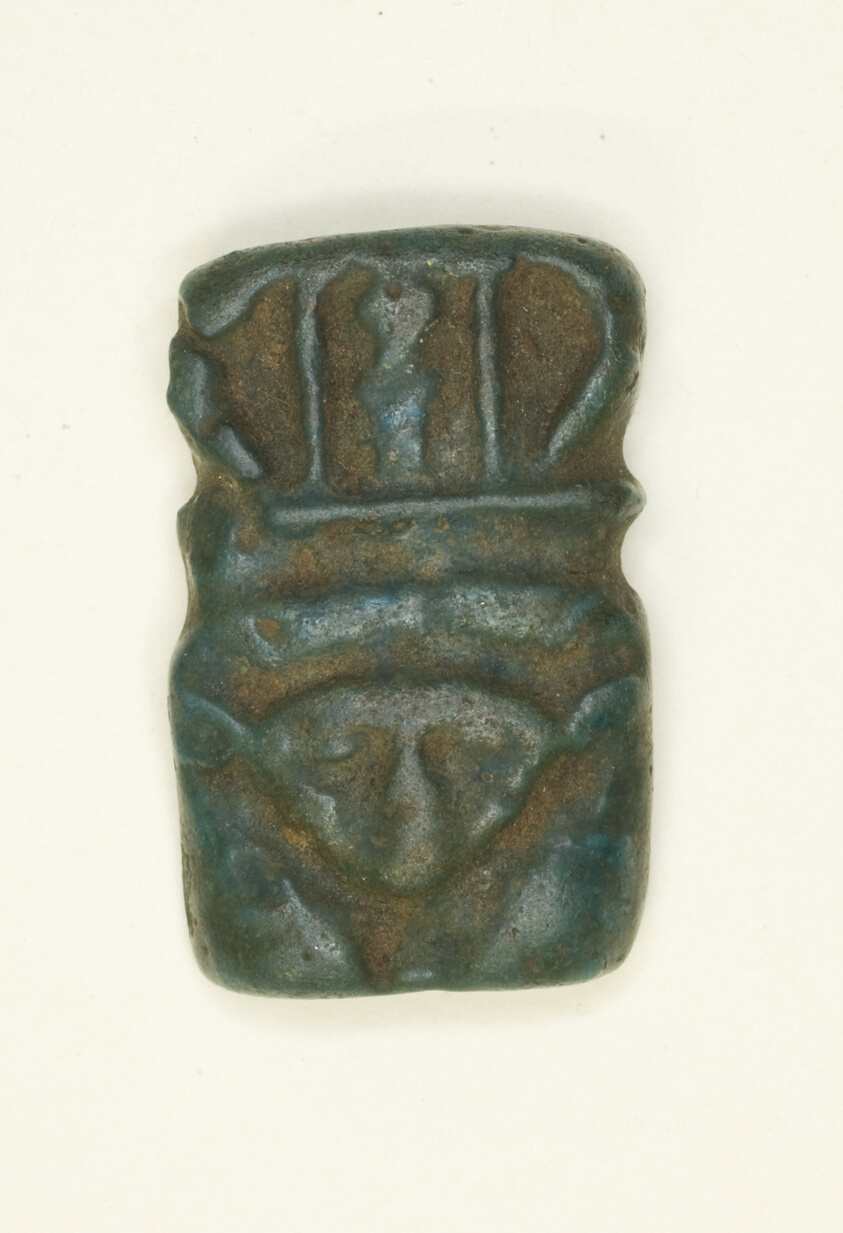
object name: Costume and Accessories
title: Amulet of the Head of the Goddess Hathor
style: roman period (egyptian), greco-roman (egyptian)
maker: Egyptian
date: Roman Period (30 BCE–395 CE)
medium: Faience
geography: Egypt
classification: amulet; jewelry; ceramics; ancient art; costume; faïence (composite material)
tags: goddesses